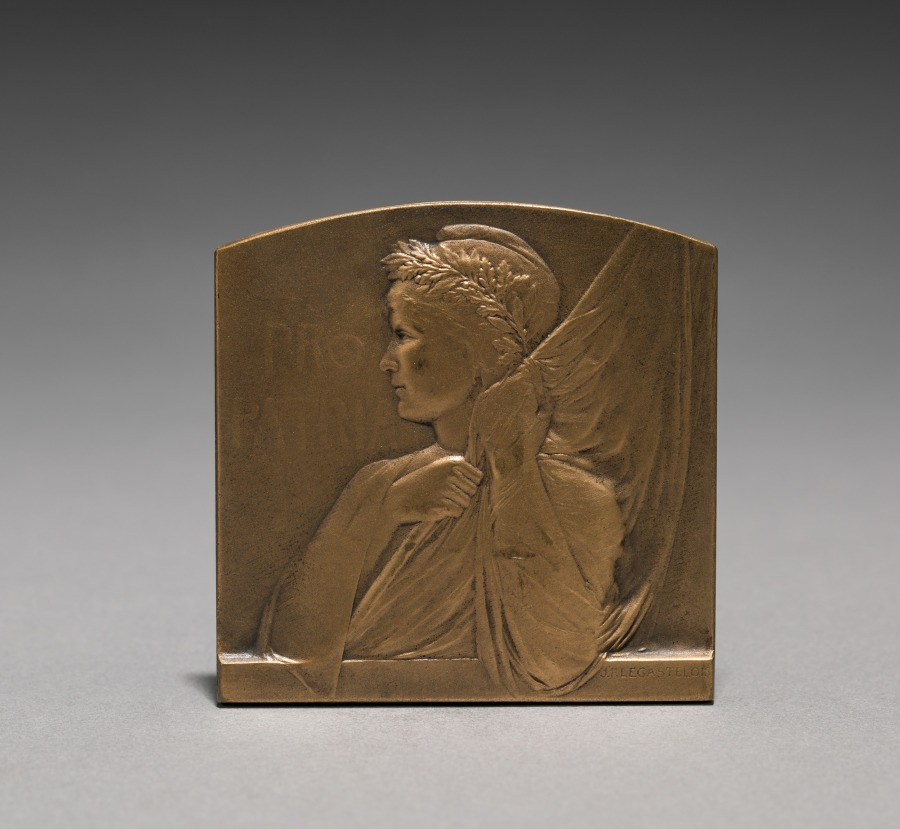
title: Medal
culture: France, 19th century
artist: Jules Prosper Legastelois (French, 1855–1931)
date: 1913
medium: bronze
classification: Metalwork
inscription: "Pro Patria."